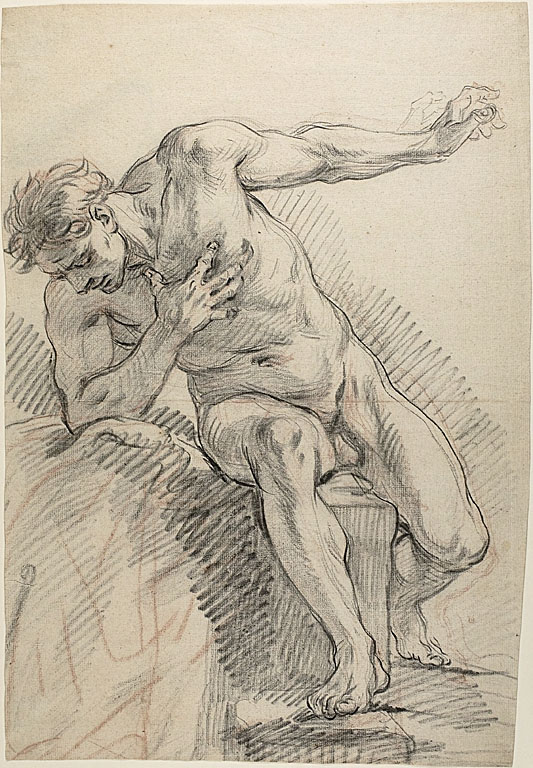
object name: Drawing and Watercolor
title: Sketch of a Male Nude Leaning on Right Elbow (recto)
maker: Attributed to Charles-Antoine Coypel; French, 1694-1752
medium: Black crayon and red chalk, on buff laid paper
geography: France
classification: chalk; drawings (visual works); prints and drawing